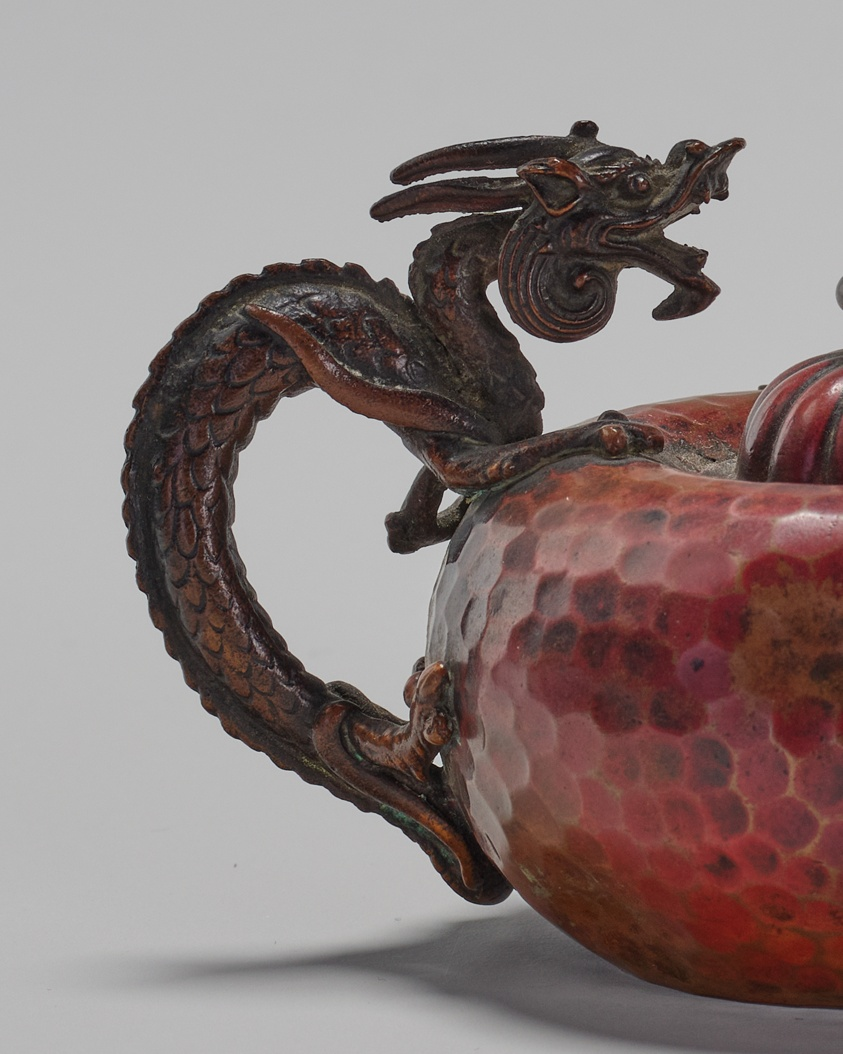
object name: Decorative Arts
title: Cigar Lighter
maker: Gorham Manufacturing Company (American, founded 1831); Providence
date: c. 1900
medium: Copper and mixed metals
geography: Providence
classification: american decorative arts; decorative arts